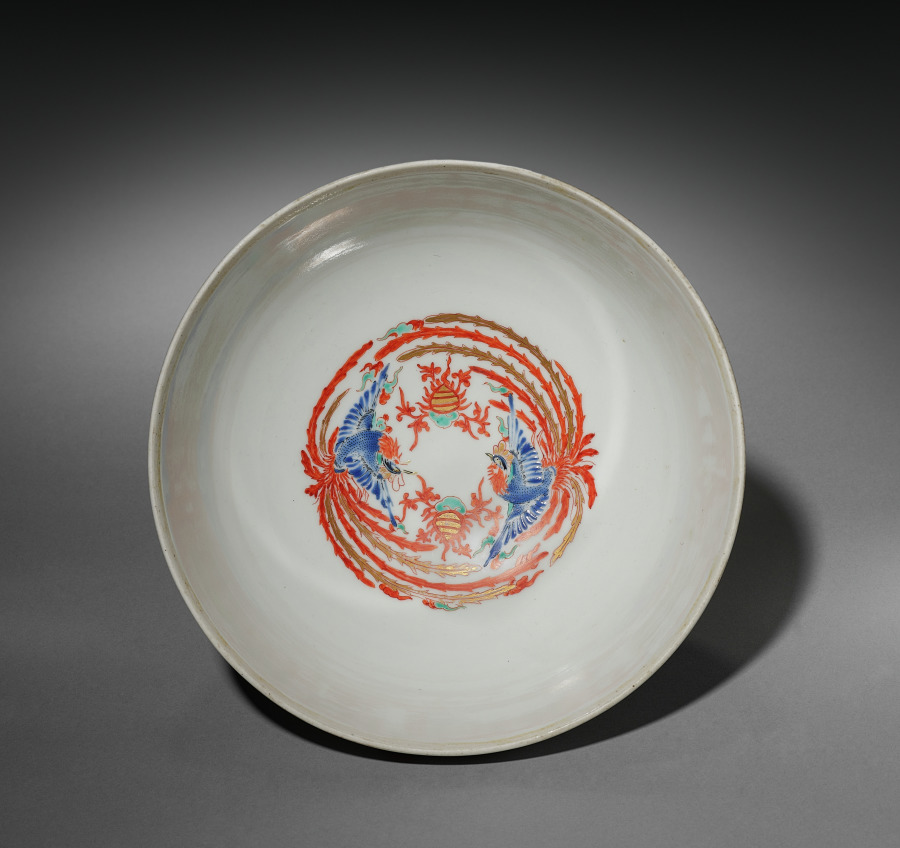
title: Covered Bowl with Chrysanthemums and Chidori: Kakiemon Ware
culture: Japan, Edo period (1615–1868)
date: early 1700s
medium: porcelain with decoration in colored enamels; molded design of waves on exterior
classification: Ceramic